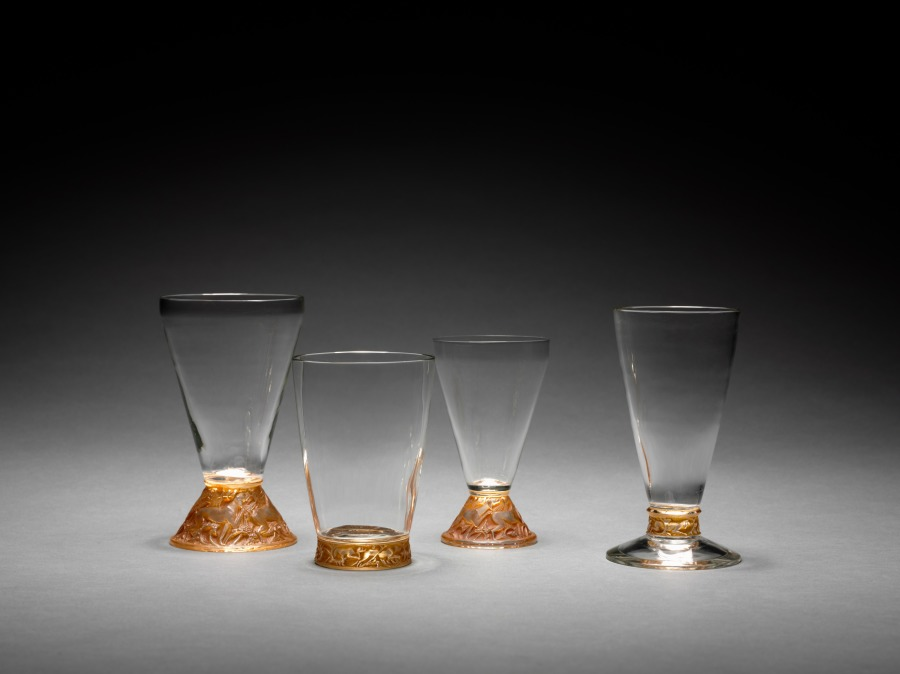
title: Hunting Dogs Footed White Wine Glass (Verre à pied, chasse chiens)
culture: France, 20th century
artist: René Lalique (French, 1860–1945)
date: c. 1913–21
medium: glass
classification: Glass